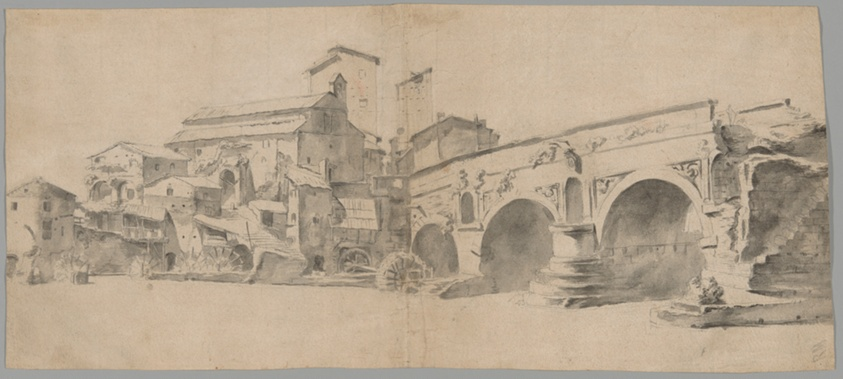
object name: Drawing and Watercolor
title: View of the Ponte Rotto, Rome, with Watermills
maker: Jan Asselijn (Dutch, c. 1610-1652)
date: late 1630s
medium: Watercolor, over graphite, on cream laid paper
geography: Netherlands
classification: wash; drawings (visual works); prints and drawing